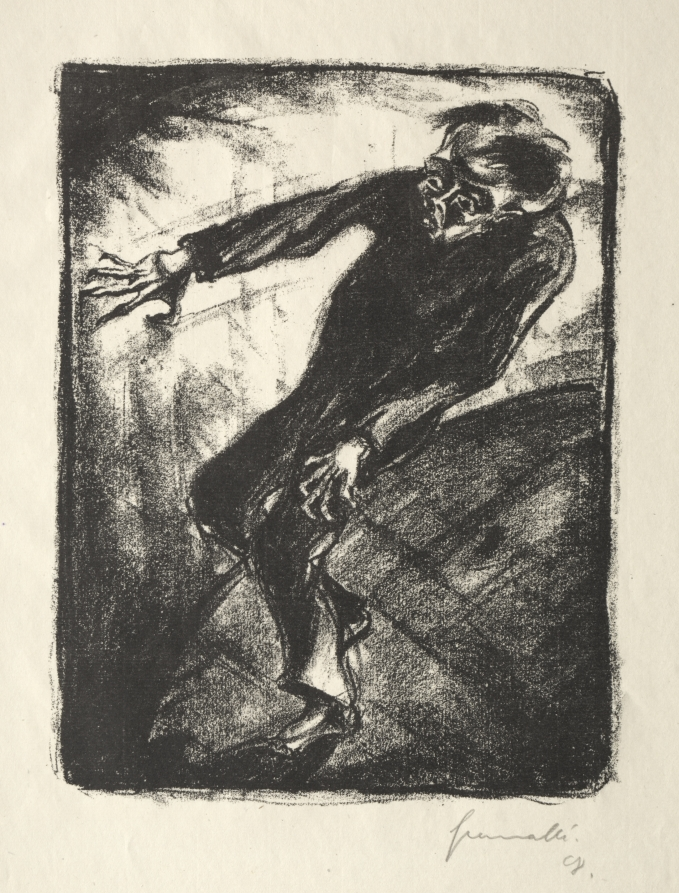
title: Whirling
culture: Germany, 20th century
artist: Walter Grammatté (German, 1897–1929)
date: 1920s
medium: lithograph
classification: Print